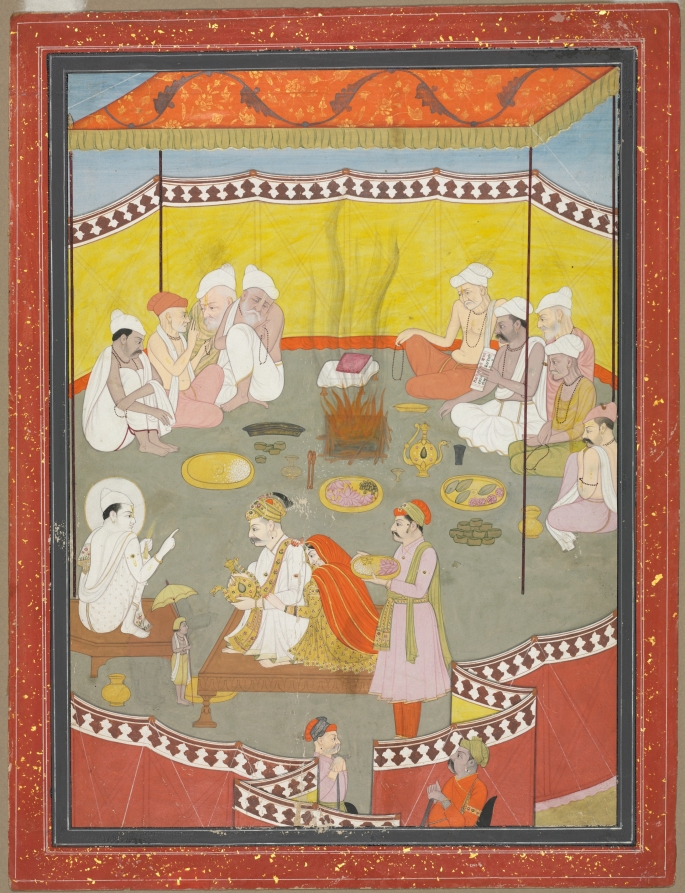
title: King Bali gives a gift of land to Vamana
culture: Northern India, Pahari kingdoms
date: 1700s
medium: Gum tempera and gold on paper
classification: Painting